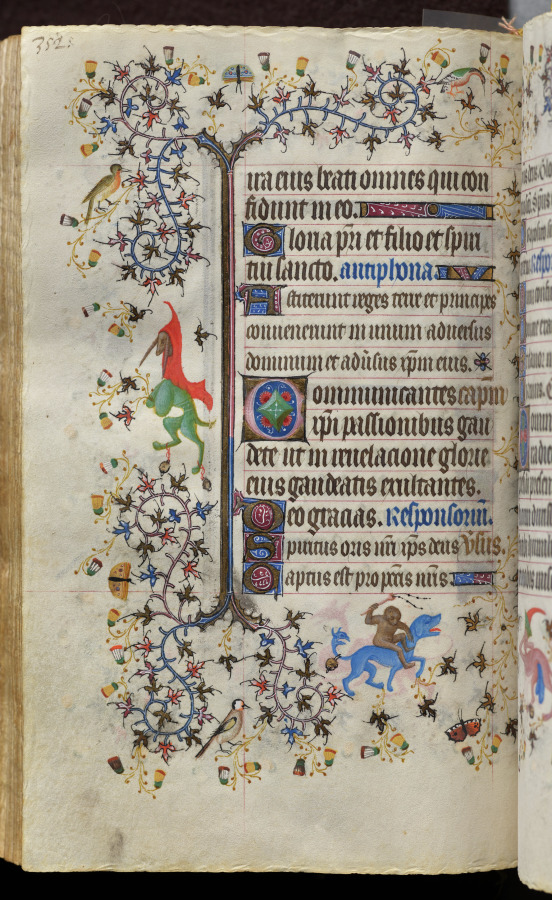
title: Hours of Charles the Noble, King of Navarre (1361-1425): fol. 171v, Text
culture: France, Paris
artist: Master of the Brussels Initials and Associates (French)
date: c. 1405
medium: ink, tempera, and gold on vellum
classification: Bound Volume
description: This precious volume was obviously highly prized by its owner, the French-born King of Navarre, who had his coat of arms painted on no less than twenty folios. Rather than directly commissioning this manuscript from a specific workshop, it seems that Charles the Noble acquired his book of hours -- perhaps ready-made for the luxury market -- while on a trip to Paris in 1404-05. A collaborative effort, six painting styles are evidenced within the pages of this codex, those of two Italians, two Frenchmen, and two Netherlanders. The painter who was responsible for the planning and decoration of the book, and who produced seventeen of the large miniatures, was a Bolognese artist known as the Master of the Brussels Initials. His principal assistant, responsible for most of the borders, was a Florentine who signed his name "Zecho" da Firenze on folio 208 verso.